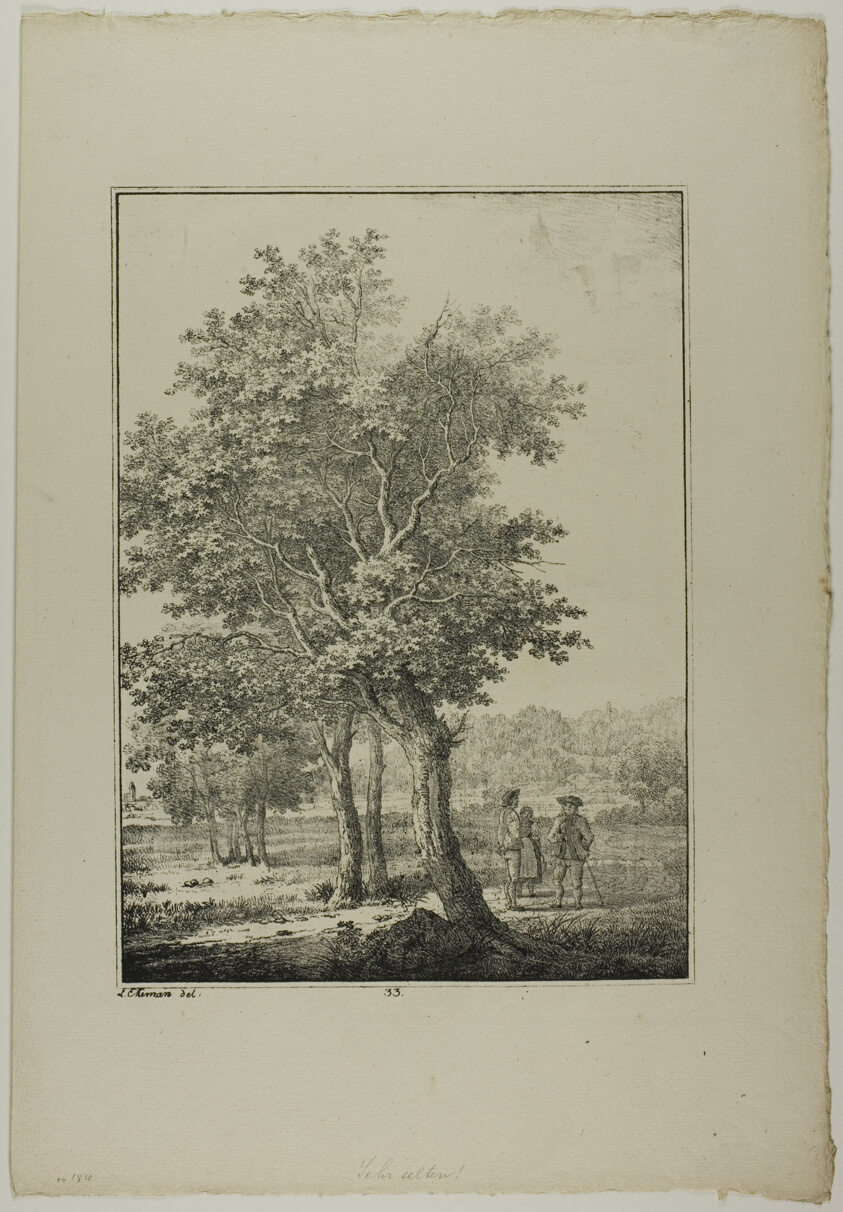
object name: Print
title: Plate 33 from Blatt Baum und Landschafts Studien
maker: Lorenz Ekemann Alesson (Swedish, 1791-1828)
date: c. 1810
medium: Lithograph on paper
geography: Sweden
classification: lithograph; print; prints and drawing